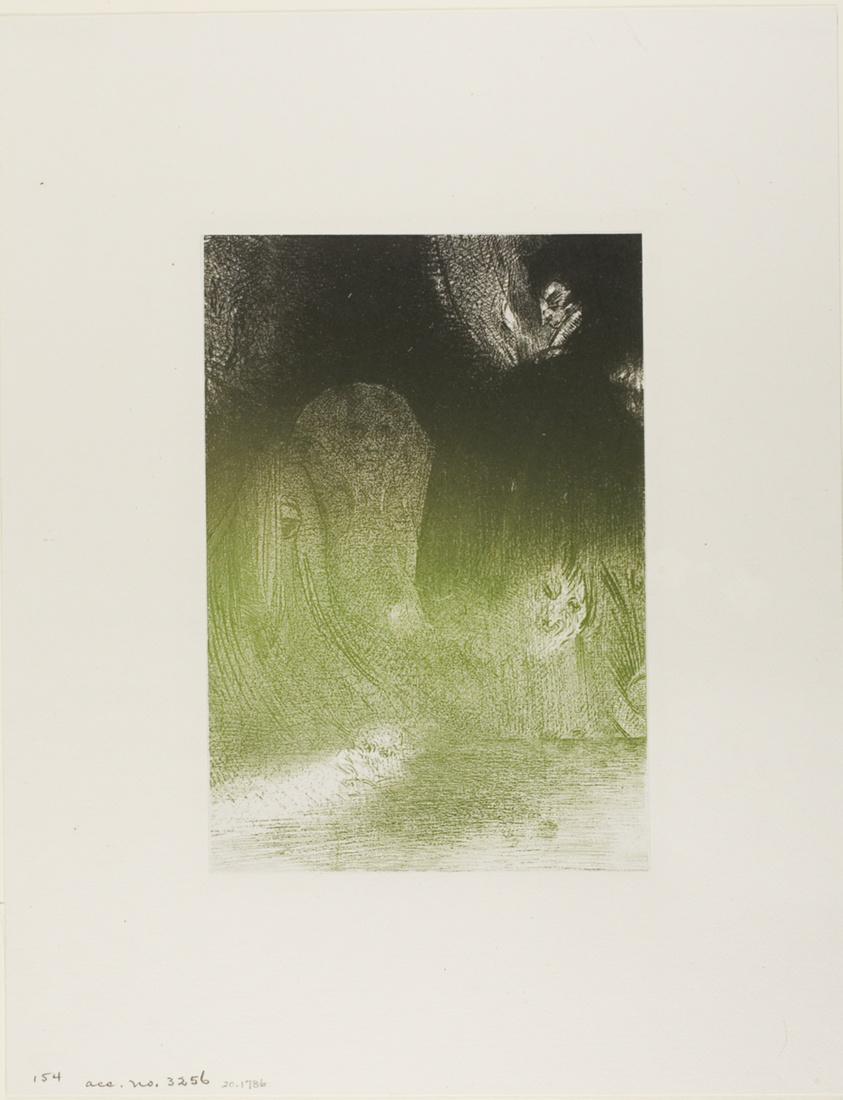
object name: Print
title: I Have Sometimes Seen in the Sky What Seemed Like Forms of Spirits, plate 21 of 24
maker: Odilon Redon (French, 1840-1916)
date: 1896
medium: Lithograph in black and green from same stone on ivory China paper laid down on ivory wove paper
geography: France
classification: lithograph; print; prints and drawing; paper